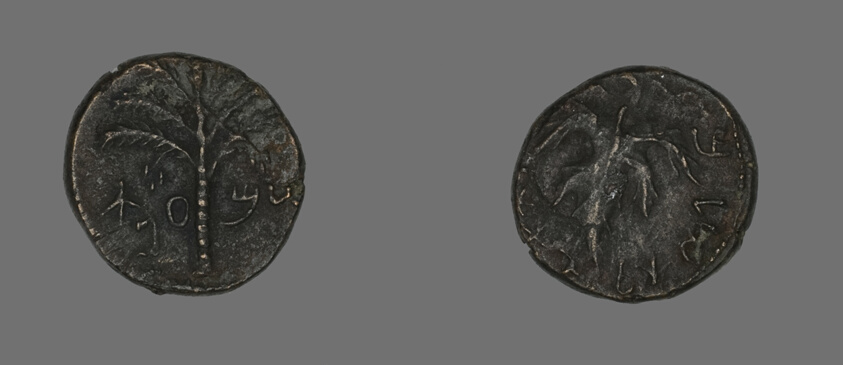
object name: Coin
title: Coin Depicting a Palm Tree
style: roman (ancient, style or period), ancient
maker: Roman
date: 133-135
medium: Bronze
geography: Roman Empire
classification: coin; ancient art